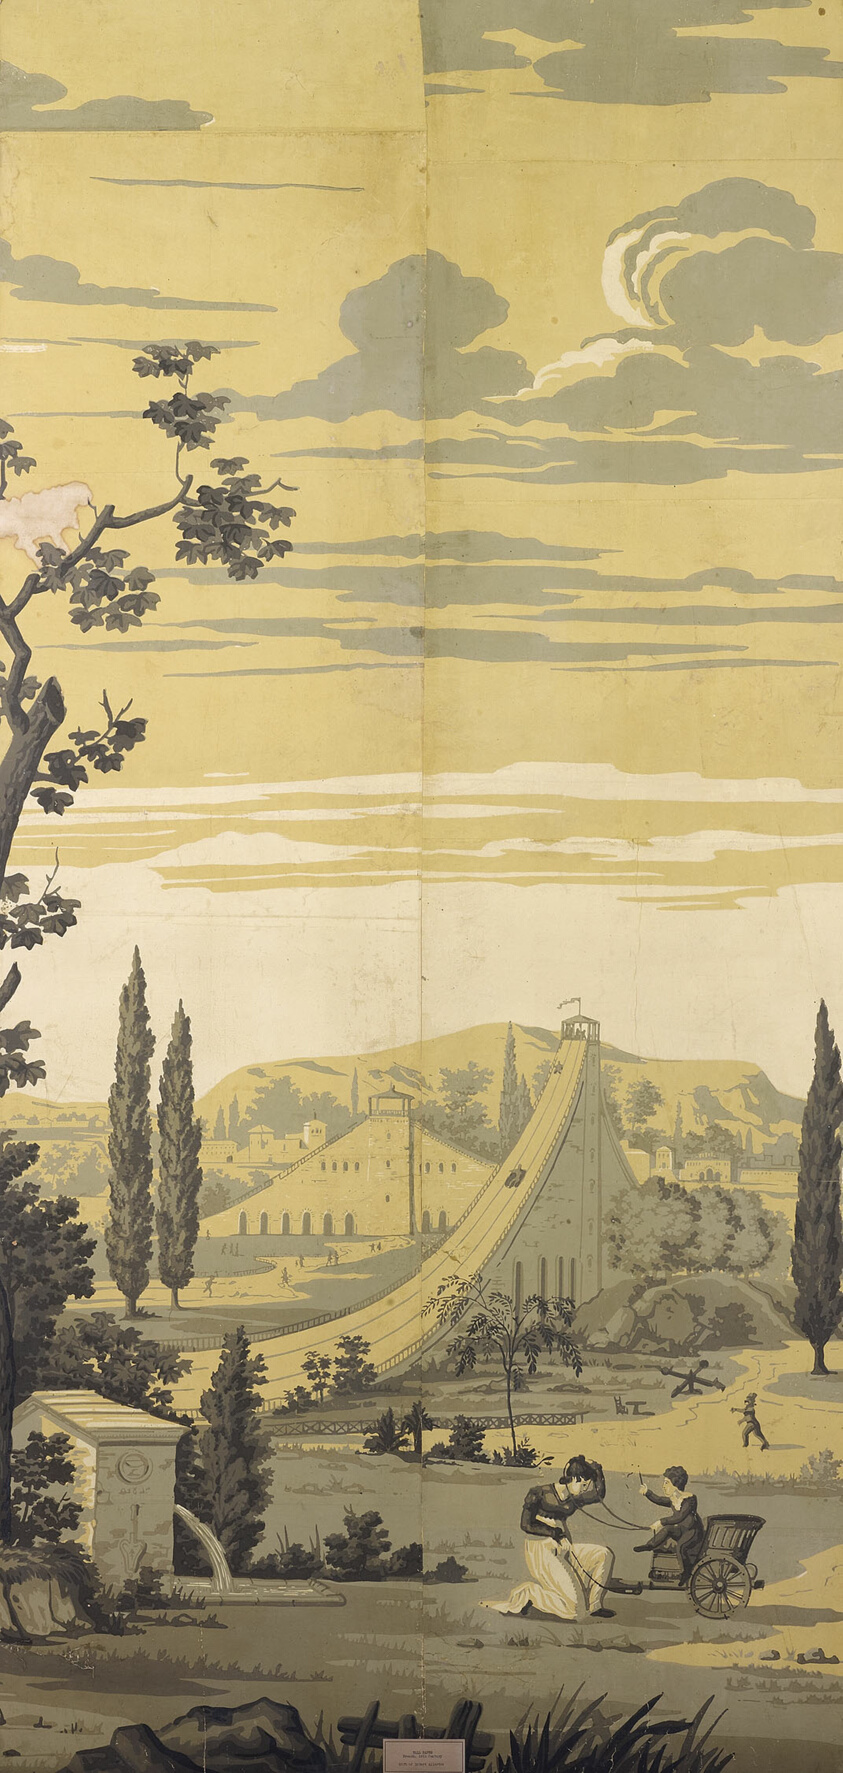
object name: Coverings and Hangings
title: Panel with a Scene in an Amusement Park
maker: England or France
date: 18th century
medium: Block-printed, color on paper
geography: England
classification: wallpaper; paper; european decorative arts